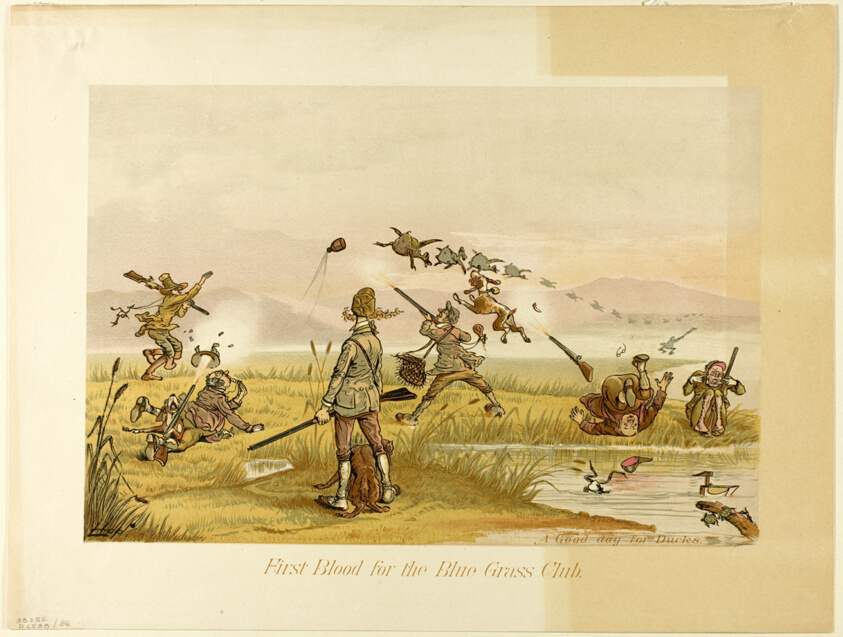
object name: Print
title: First Blood for the Blue Grass Club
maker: Augustus Hoppin (American, 1828-1896)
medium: Color lithograph on newsprint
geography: United States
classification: lithograph; print; prints and drawing